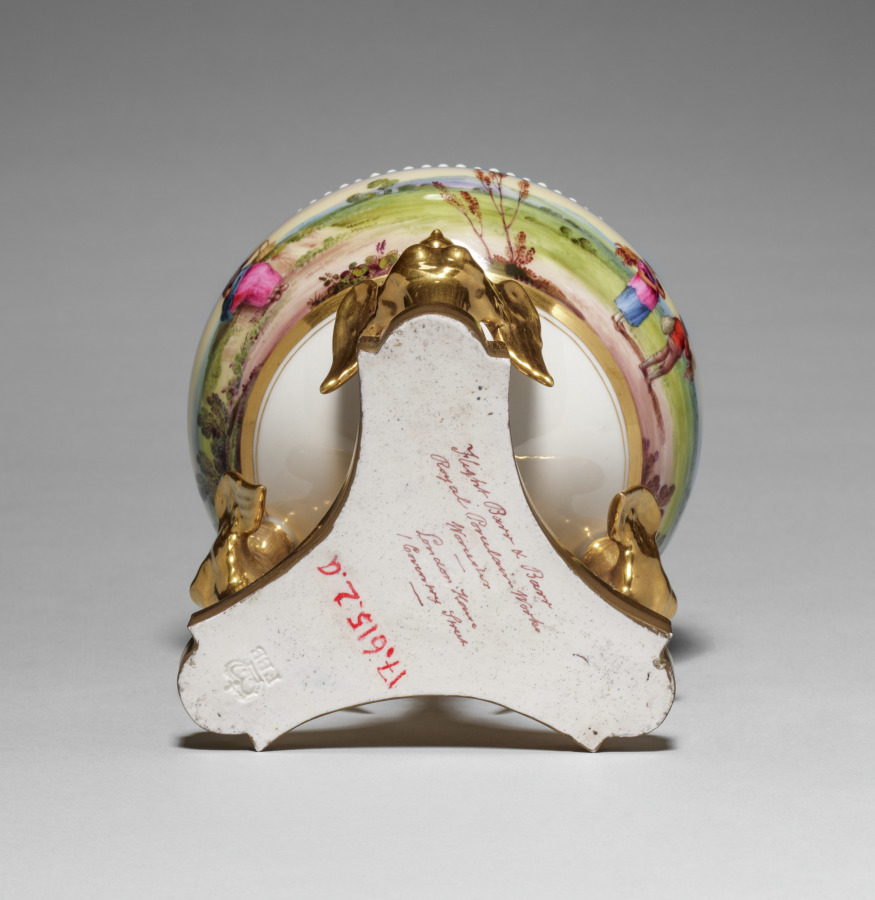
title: Urn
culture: England, Worcester, 19th century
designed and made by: Flight, Barr and Barr (British)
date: c. 1815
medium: artificial porcelain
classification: Ceramic